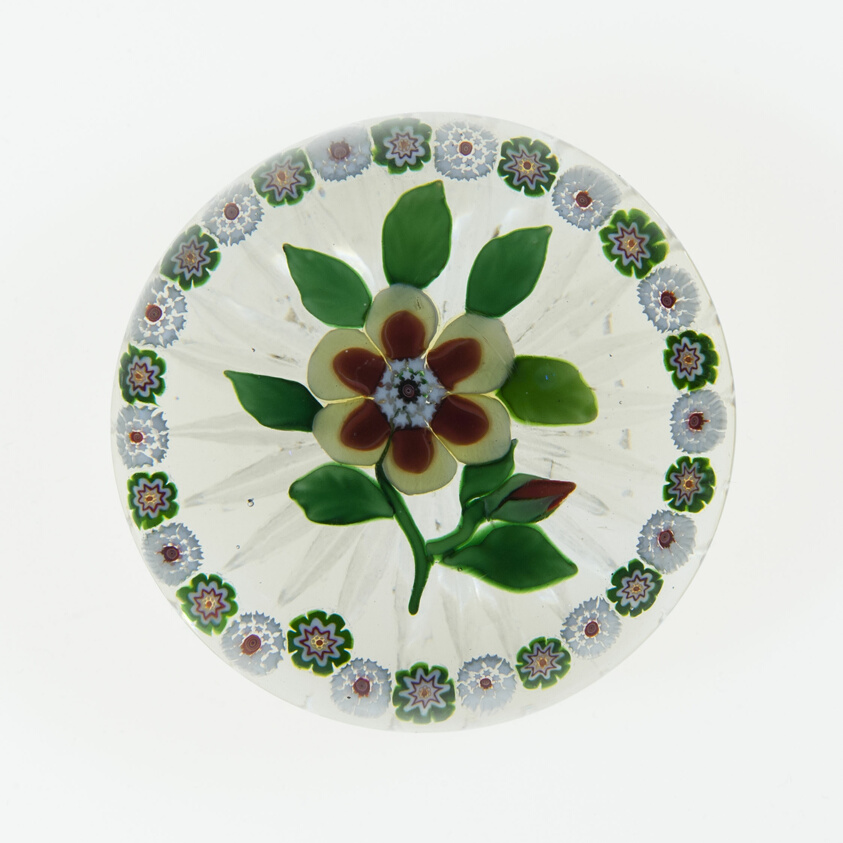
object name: Glass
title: Paperweight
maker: Baccarat Glassworks (Cristalleries de Baccarat); Lorraine, France, founded 1764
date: c. 1848–55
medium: Glass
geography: Baccarat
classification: paperweight; glass